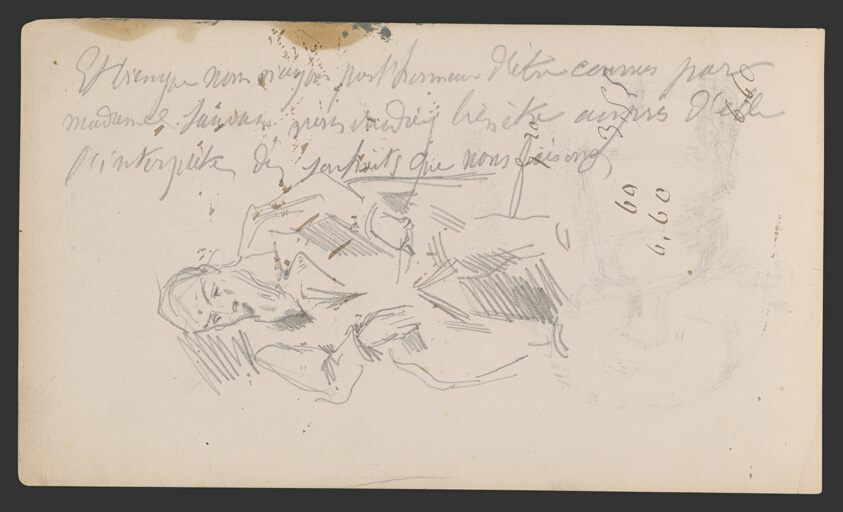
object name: Drawing and Watercolor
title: Sketchbook No. 2 (L'Estaque)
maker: Paul Cézanne; French, 1839-1906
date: 1875–86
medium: Graphite and pen and ink drawings on paper, bound into a book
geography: France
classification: sketchbook; graphite; prints and drawing; paper